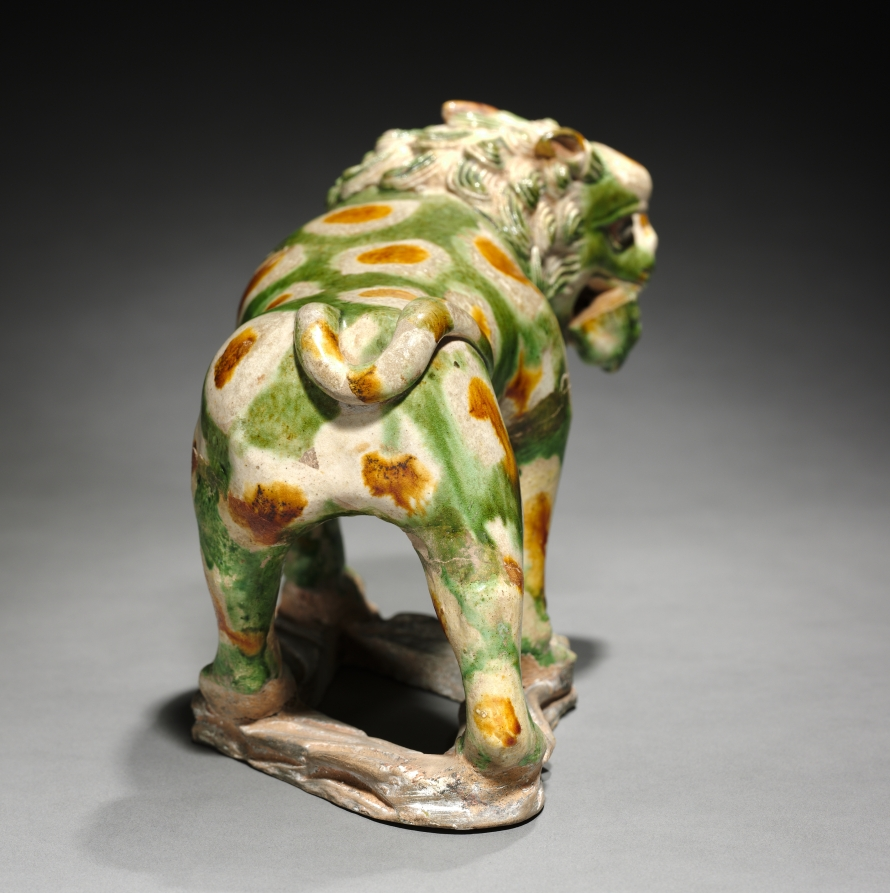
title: Lion with Cub in Mouth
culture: China, Tang dynasty (618-907)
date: 618–907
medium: earthenware with polychrome glaze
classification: Sculpture